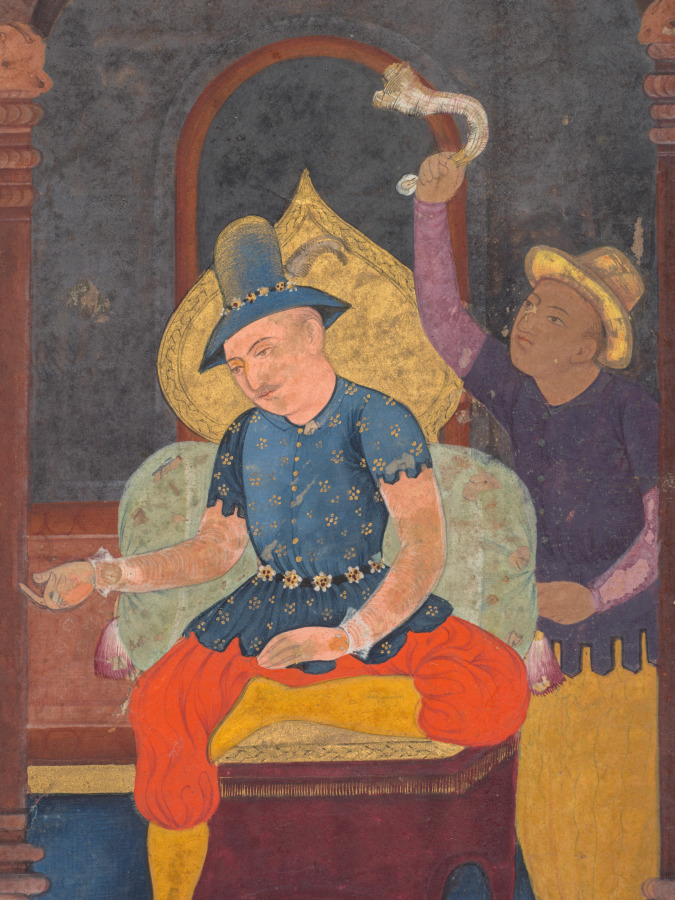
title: Salome Receiving John the Baptist’s Head on a Platter (folio 112 verso), from a Mirror of Holiness (Mir’at al-quds) of Father Jerome Xavier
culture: Mughal India, Allahabad, made for Prince Salim (1569–1627)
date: 1602–4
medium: Gum tempera, ink, color, and gold on paper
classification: Manuscript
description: Herod, King of Judea, sits on a Mughal-style throne as his wife’s daughter Salome reaches for the freshly severed head of John the Baptist. John had offended Herod’s wife, so she took revenge by having her daughter seduce Herod into granting her this wish. Salome is depicted modestly in this painting, and the court musician at the lower left looks on in disgust. The lion head capitals on the pillars above Herod are upside down, seemingly in disapproval of the debauched king.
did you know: Column capitals in Herod’s palace have angels seated on upside-down lion heads.